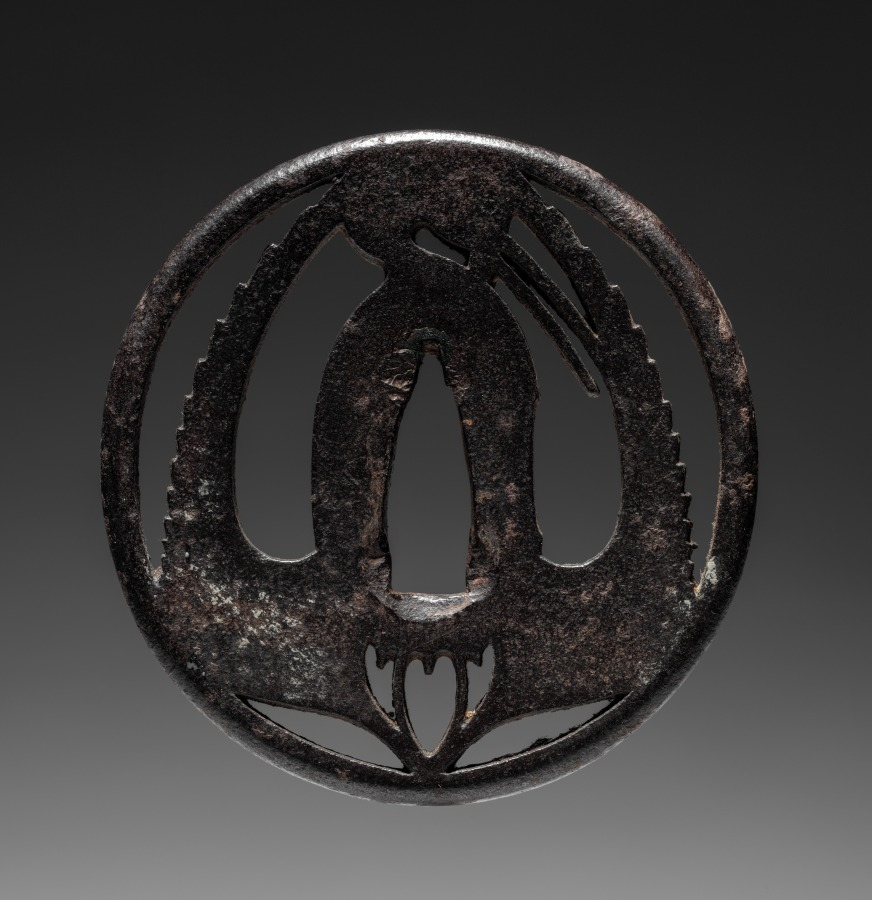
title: Sword Guard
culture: Japan, Edo period (1615–1868)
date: 1615–1868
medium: iron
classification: Arms and Armor